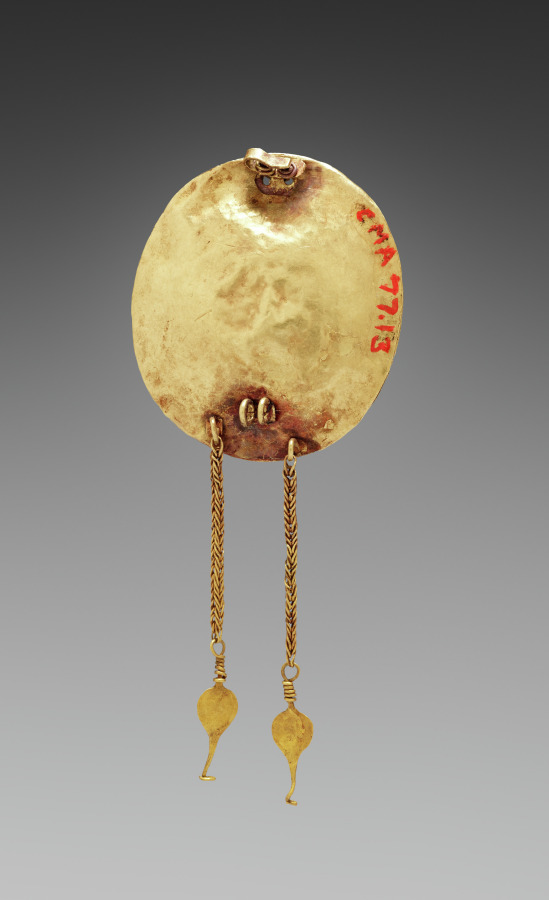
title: Intaglio: Imperial Eagle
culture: Italy, Rome, probably Augustan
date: c. 1–25 CE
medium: carnelian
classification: Jewelry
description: This intaglio, or engraved gem, depicts an eagle with wings partially spread, a lightning bolt clutched in its feet. The bird looks to the upper right, suggesting it may be about to take flight. This gem is expertly carved, with each individual feather of the eagle described with thin lines. The eagle was a symbol associated with the Roman imperial family, Roman military, and Jupiter, the supreme Roman deity. The setting is likely ancient, and it retains traces of enameling in some loops.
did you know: According to the Roman author Pliny, ancient carnelian was primarily sourced from India.